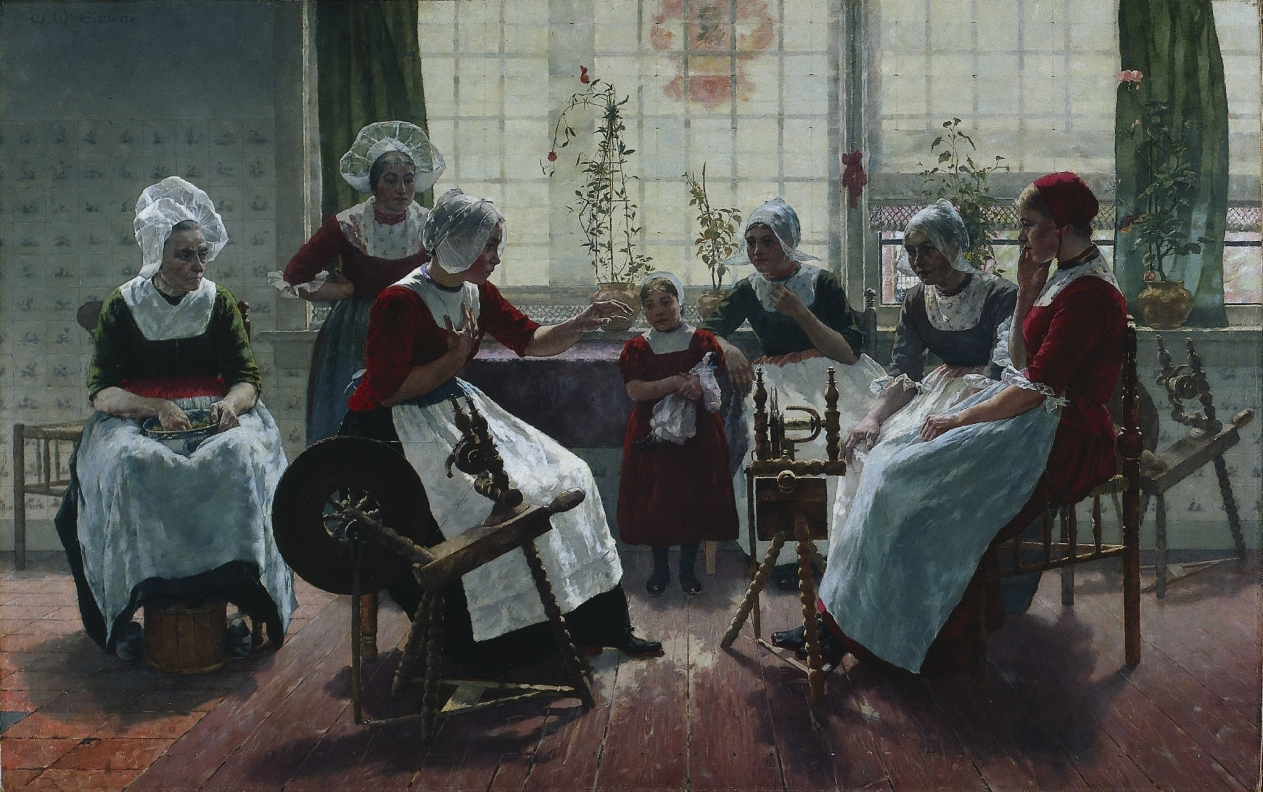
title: The Ghost Story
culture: America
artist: Walter MacEwen (American, 1860–1943)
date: 1887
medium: oil on canvas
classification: Painting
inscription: signed upper left: W. McEWEN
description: During the 1880s, the Netherlands became a magnet for several American artists, among them Walter MacEwen. His most famed painting, The Ghost Story, presents a group of individuals in a Dutch interior listening with rapt attention to spooky narration delivered by a woman at a spinning wheel. A young girl clutches her doll in fascination.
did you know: The women in this painting wear the traditional clothing of Volendam, a fishing village located in the province of North Holland.